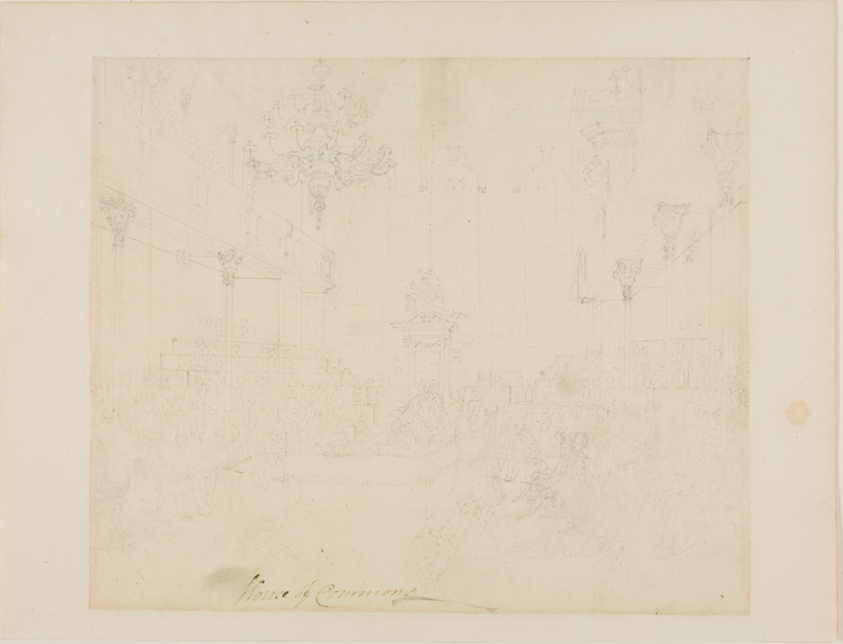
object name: Drawing and Watercolor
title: Study for House of Commons, from Microcosm of London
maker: Augustus Charles Pugin (English, born France, 1762-1832); Thomas Rowlandson (English, 1756-1827)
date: c. 1808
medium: Graphite on cream wove paper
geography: England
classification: graphite; drawings (visual works); prints and drawing